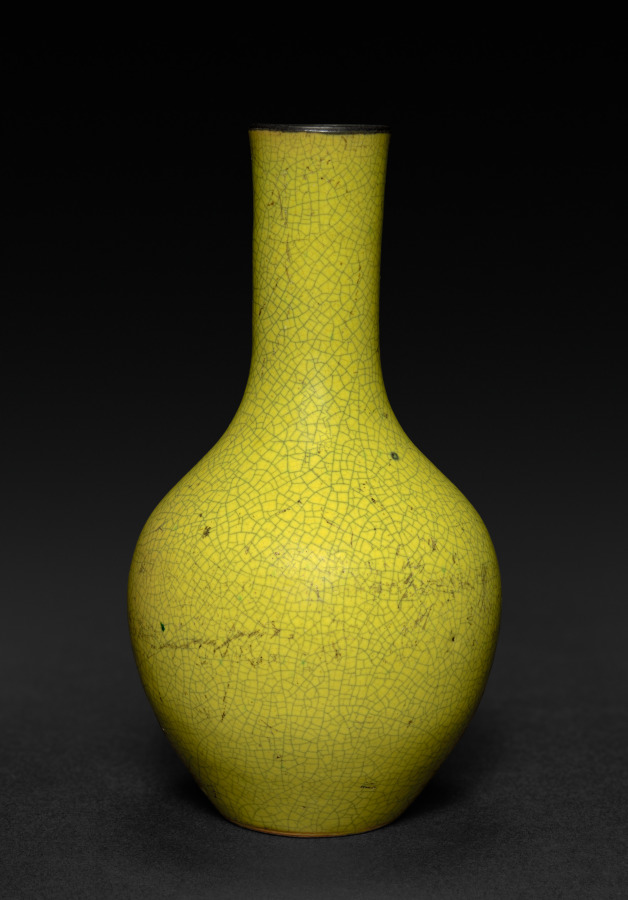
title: Vase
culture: China, Qing dynasty (1644-1911)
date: 1644–1911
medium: porcelain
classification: Ceramic